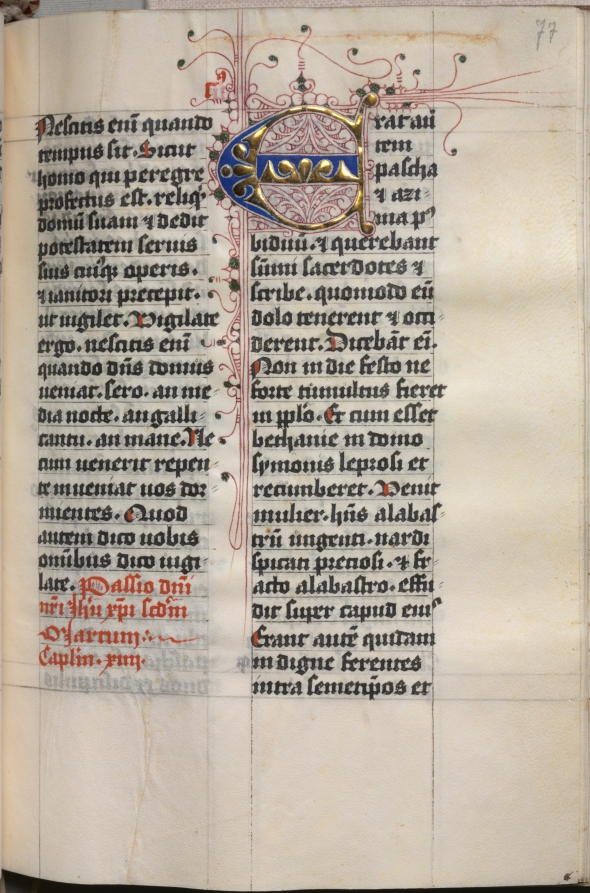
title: Gospel Book with Evangelist Portraits: Decorated Initial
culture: Germany, Middle Rhine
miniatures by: Master of the House-Book (German, c. 1470–1500)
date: c. 1480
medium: ink, tempera, and gold on vellum; original blind stamped leather binding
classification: Bound Volume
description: The four gospels are preceded by a full-page portrait miniature of the appropriate evangelist. Per tradition, they are represented as contemporary scribes surrounded by all the tools of their trade—ink pots, quill pens, and penknives. The anonymous illuminator of these miniatures, called the Hausbuch Master, is known primarily for an album of lively drawings as well as some 90 copper engravings now in Amsterdam. He was also apparently a panel painter of some distinction. The skillful pen work, tracery, and vine scrolls, as well as the large initials, are the work of other artists. The binding is original.